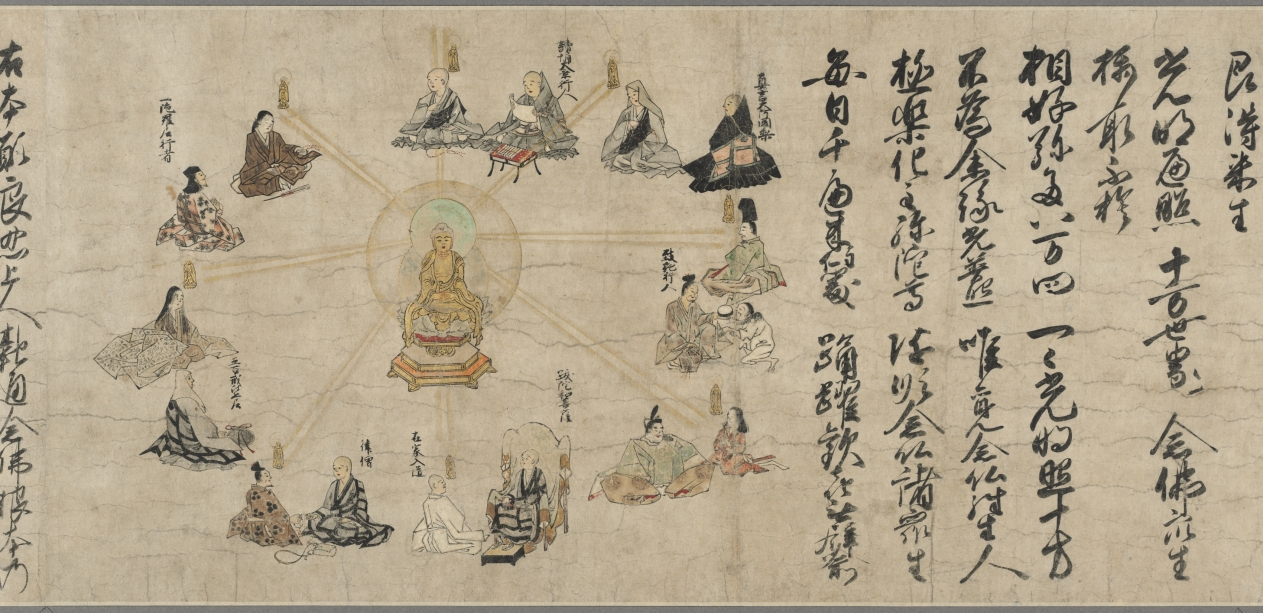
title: The Illustrated Miraculous Origins of the Yūzū Nenbutsu School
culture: Japan, Kamakura period (1185–1333)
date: early 1300s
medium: Handscroll; ink, color, and gold on paper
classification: Painting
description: This painting is the second of a set of two illustrated handscrolls. The first scroll depicts the biography of the Japanese Buddhist monk Ryōnin. This scroll begins with scenes of Ryōnin’s death and relates episodes illustrating the efficacy of following his teachings. Ryōnin asserted the total interconnectedness of all things and the spiritual benefit of chanting the name of the Buddha Amida for one another.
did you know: The other scroll from this two-scroll set belongs to the Art Institute of Chicago.